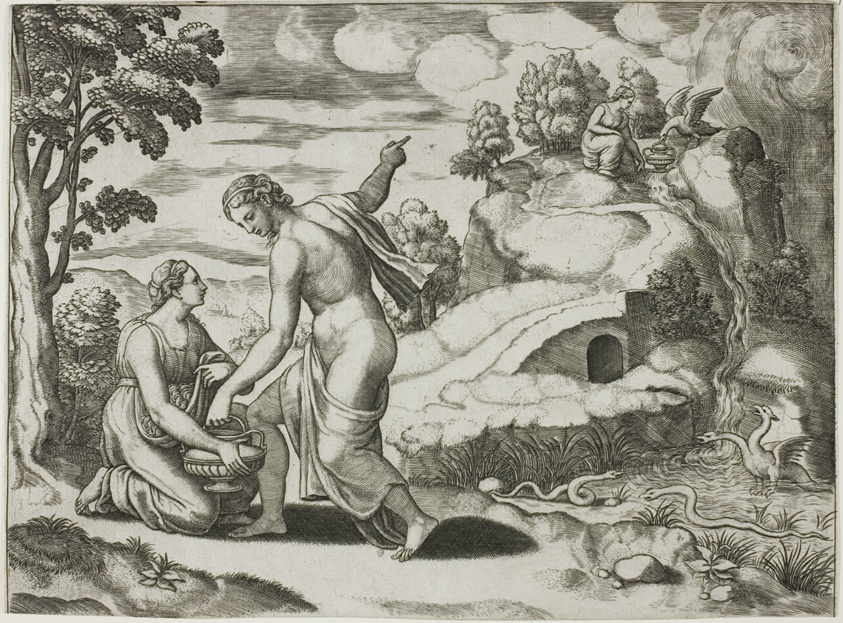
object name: Print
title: Isolated Subject from the Story of Psyche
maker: Master of the Die (Italian, active c. 1530-1560); after Raphael (Italian, 1483-1520)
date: c. 1532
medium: Engraving, printed in black, on paper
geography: Italy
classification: print; prints and drawing